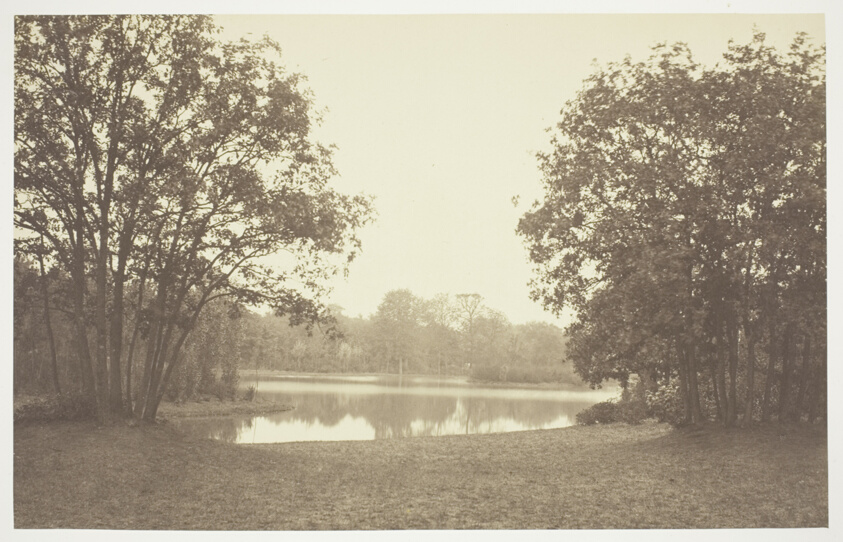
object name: Photograph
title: Untitled, from the series "Bois de Boulogne"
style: 19th century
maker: Charles Marville (French, 1813–1879)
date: c. 1850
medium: Albumen print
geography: France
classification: albumen silver print; photographic process; photography; photograph